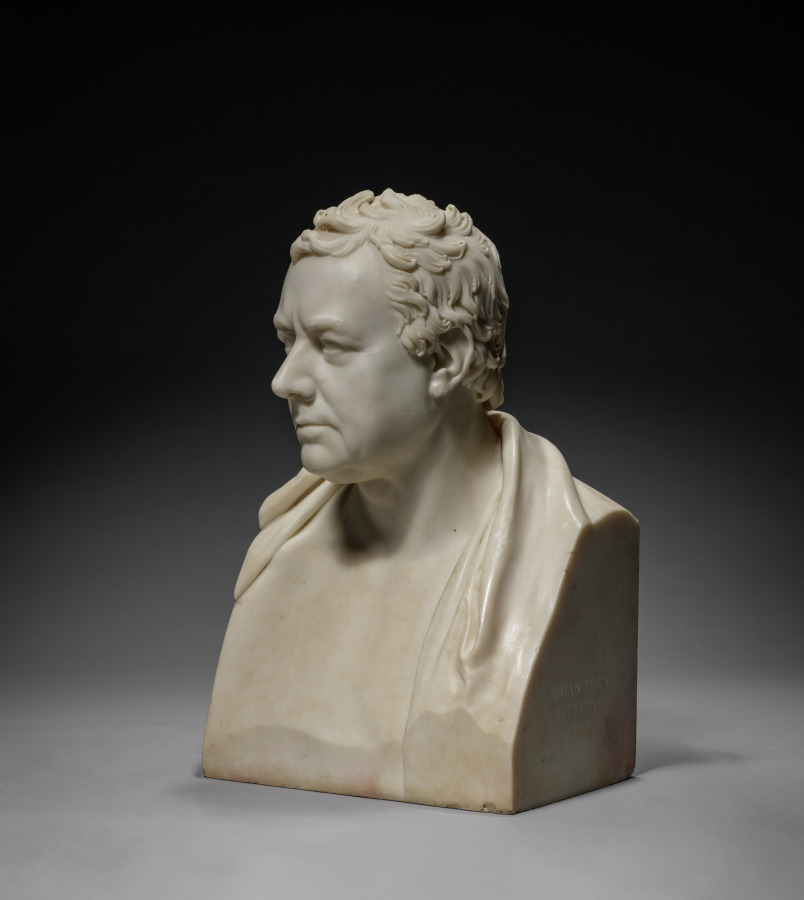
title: Sir H. C. Englefield, Bart.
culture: England, 19th century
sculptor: Francis Legatt Chantrey (British, 1781–1841)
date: 1818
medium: marble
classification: Sculpture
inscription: inscribed left side: Chantrey/Sculptor/1818; rear: Sir H. C. Englefield, Bart.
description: To modern eyes, a bare-chested portrait of a man in his mid-60s might seem undignified. However, it was fashionable for gentlemen of Englefield’s generation to be portrayed in this manner, deliberately referencing the antique sculptures of Roman statesmen they admired. As a Catholic, Englefield was barred from taking part in politics in England; however, he was a member of several clubs devoted to the amateur study of art, science, and history. Among these were the Society of Dilettanti, which championed the works of antiquity and promoted the creation of modern art in the same spirit—like this marble bust by celebrated sculptor Francis Legatt Chantrey.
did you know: Initially, Chantrey tried to establish himself as a portrait painter. After 1805, he painted only on occasion and from 1811–20, he became the leading portrait sculptor in Regency Era Great Britain.